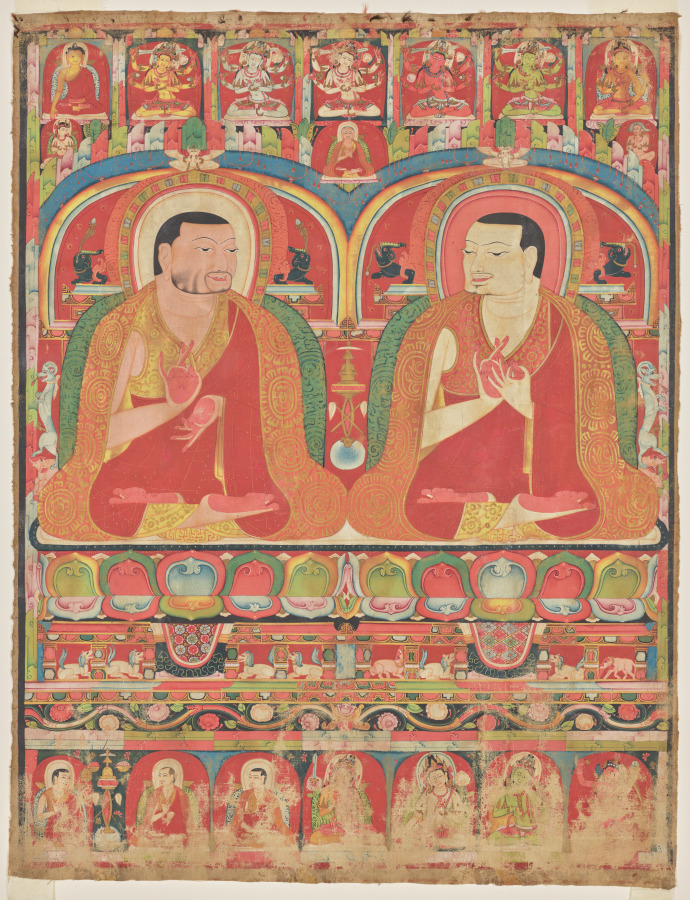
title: Portraits of Two Lineage Masters of the Kagyu Order: Phagmo Drupa (1110–1170) and Tashipel (1142–1210)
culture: Central Tibet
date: c. 1236–1310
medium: Gum tempera on sized cotton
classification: Painting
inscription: [1] ōṃ ŌṂ [2] sa rva vyid [3] svā hā// ōṃ [4] su pra ti ṣṭha vajra [5] svā hā// ye dha [6] rma he tu pra bha vā he tun te śan [7] ta tha ga to hya va tad de ṣan ca [8] yo ni ro dha ye vaṃ vā [9] ti ma [hā] śra [ma] ṇa// bzod [10] pa dka’ A thub bzod [11] daṃ pa ni[//] mya ngan ’das [12] ces sangs rgyas gsung// [13] rab tu byung ba gzhan la gnod pa ni dang// [14] gzhan la ’tshe HŪṂ ba de ni dge sbyong ma [15] yin no//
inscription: [1] ōṃ ŌṂ [2] sa rva vyid svā [3] hā// ōṃ su pra [4] ti ṣṭha vajra svā hā// [5] ye dha rma he tu pra bha vā he tun te śan ta tha ga to [6] hya va tad de ṣan ca yo ni ro dha e vaṃ vā ṭi ma hā [7] śra ma na ye// bzod pa dka’ thub [8] bzod pa daṃ pa ni// mya ngan pa [9] ’das ces A sangs rgyas gsung: [10] rab tu byung ba gzhan la gnod pa dang[//] gzhan la ’tshe ba [11] de ni dge sbyong ma yin HŪṂ no// ōṃ ma ni pad me hūṃ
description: High-level leaders of Buddhist monastic institutions were frequent portrait subjects of early thangka painting (devotional cloth scrolls) in Central Tibet. The lama (Tibetan monk) on the right founded Taklung Monastery in Lhasa, the capital of Tibet, which became an important institutional center of the Kagyu order. He is shown in discourse with his predecessor, whose teacher Gampopa (1079–1153), in turn, is the tiny gray-haired lama centered above them, between the colorful stylized mountain ranges. Their halos, lotus pedestal, and thrones with spitting elephant-trunked crocodiles and rearing griffins elevate them to the level of Buddhas and bodhisattvas. Despite their deification, they are still depicted with individualized facial features.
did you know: The Five Cosmic Buddhas in their six-armed forms are aligned at the top.